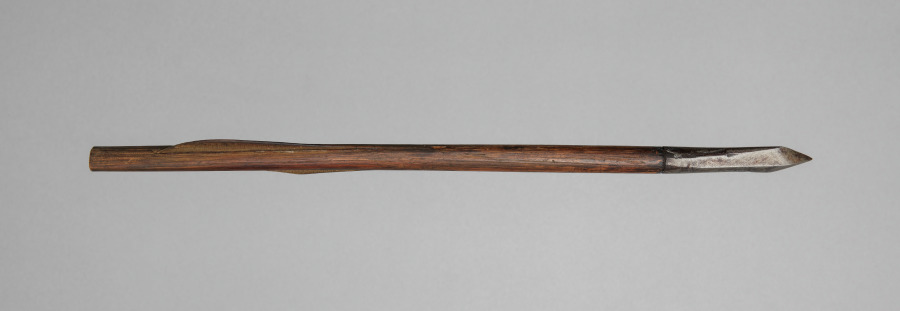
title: Crossbow Bolt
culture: Germany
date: 1500s-1600s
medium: wood, leather, steel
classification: Arms and Armor